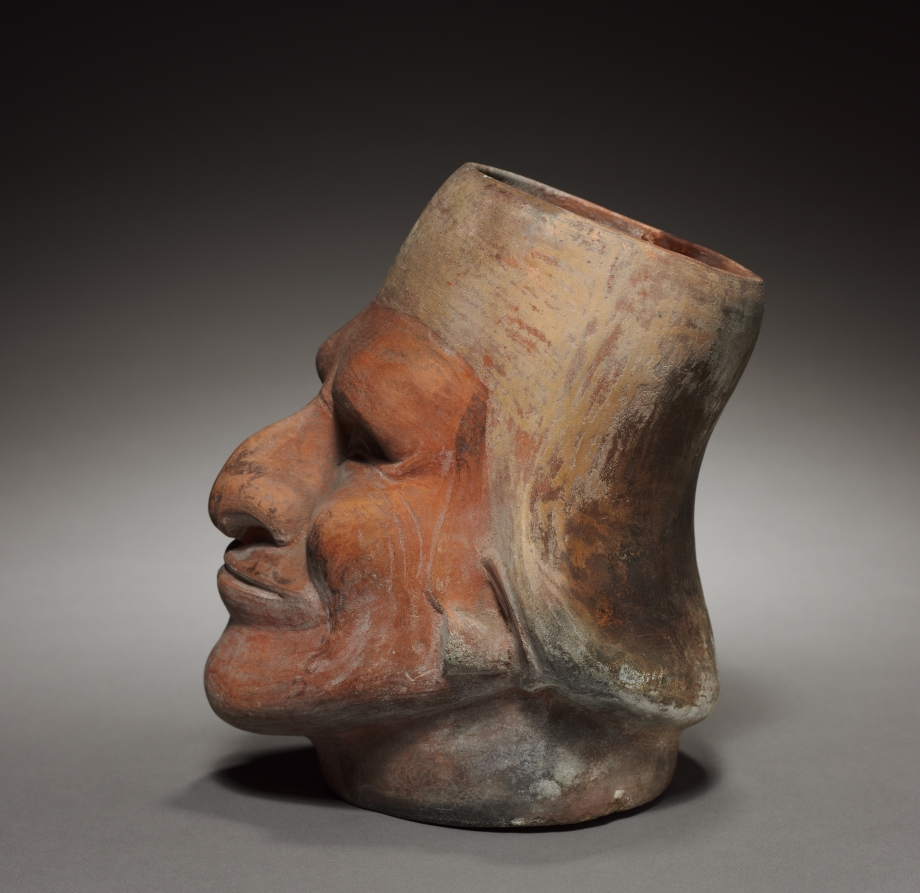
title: Vase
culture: Peru, Mochica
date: before 1930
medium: pottery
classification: Ceramic